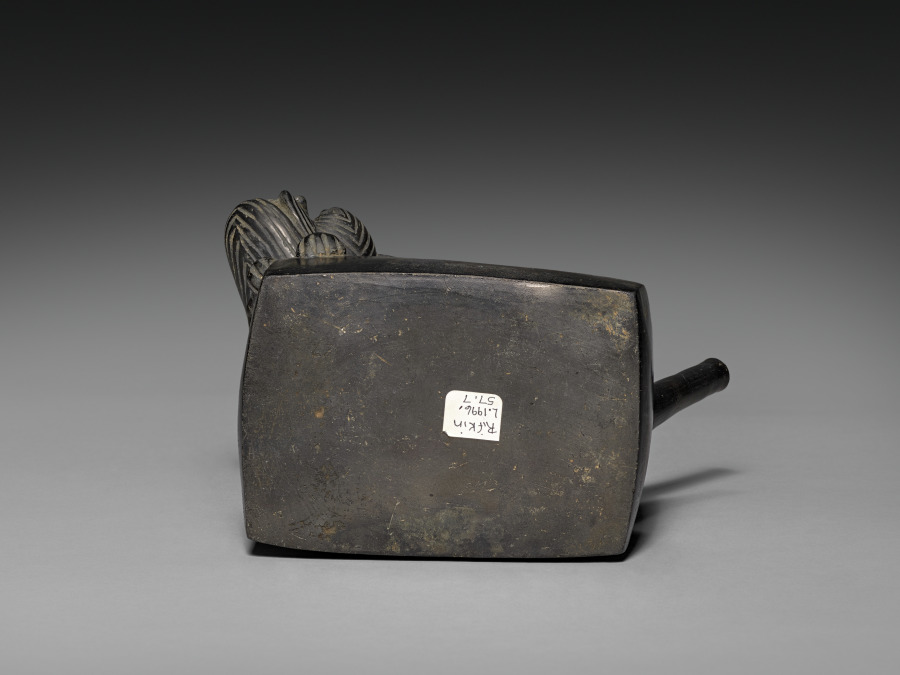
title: Vessel with Reclining Dog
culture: Central Andes, North Coast, Chimú-Inka style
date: 1470–1532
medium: ceramic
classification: Ceramic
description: This vessel represents a Peruvian hairless dog who has recently given birth and seems to be taking a break from maternal obligations. The meanings of such dogs may be connected to the trade networks that brought them to Peru from Mexico in the late pre-Hispanic period. Perhaps these foreign ties made them prestige animals whose breeding engendered further status for the owner.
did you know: This vessel represents a Peruvian hairless dog who has recently given birth.